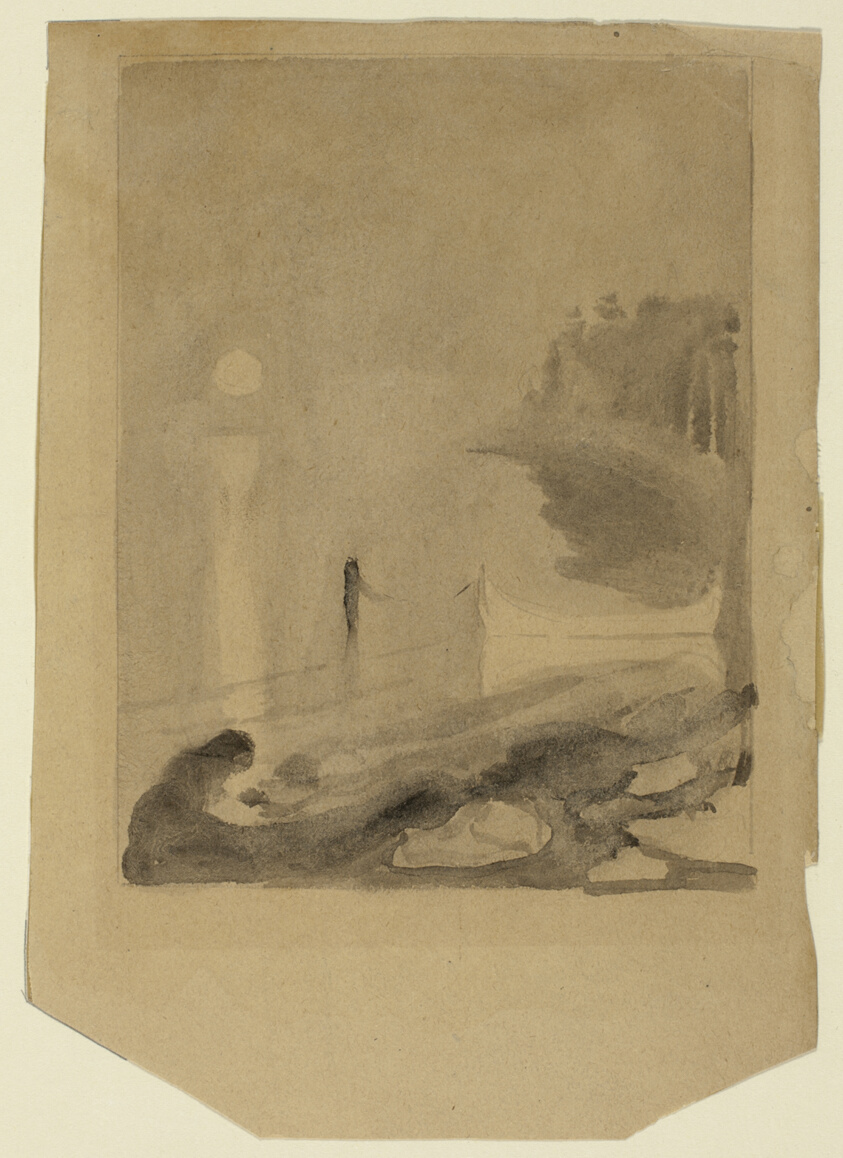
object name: Drawing and Watercolor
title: A Boat Tied to a Pier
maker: Edvard Munch (Norwegian, 1863-1944)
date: 1892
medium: Brush and black and gray wash, over touches of graphite, on tan wove paper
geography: Norway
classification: ink or chalk wash; drawings (visual works); prints and drawing